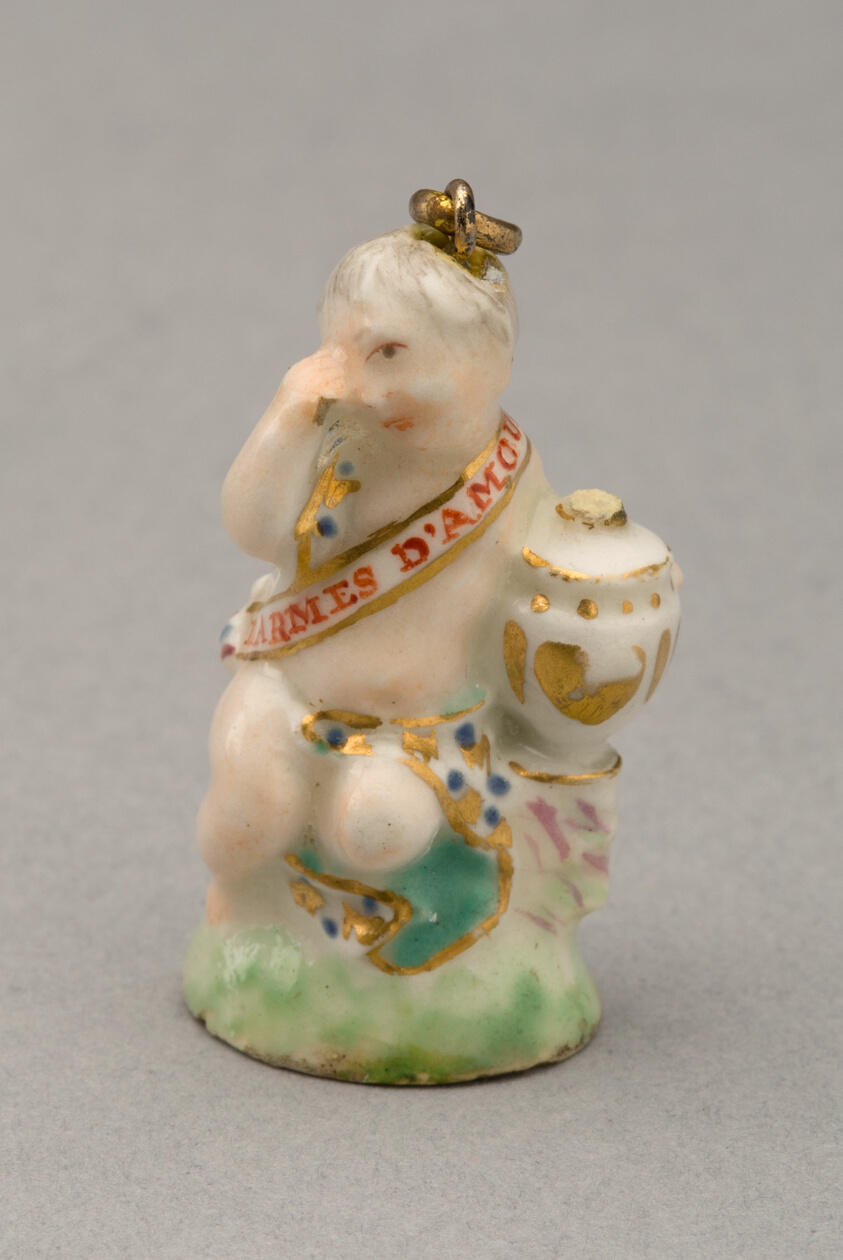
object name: Ceramics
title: Seal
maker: Chelsea Porcelain Manufactory; London, England, c. 1745-1784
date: 1750/70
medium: Soft-paste porcelain, polychrome enamels and gilding; hardstone and metal mount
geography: Chelsea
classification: porcelain; ceramics; european decorative arts